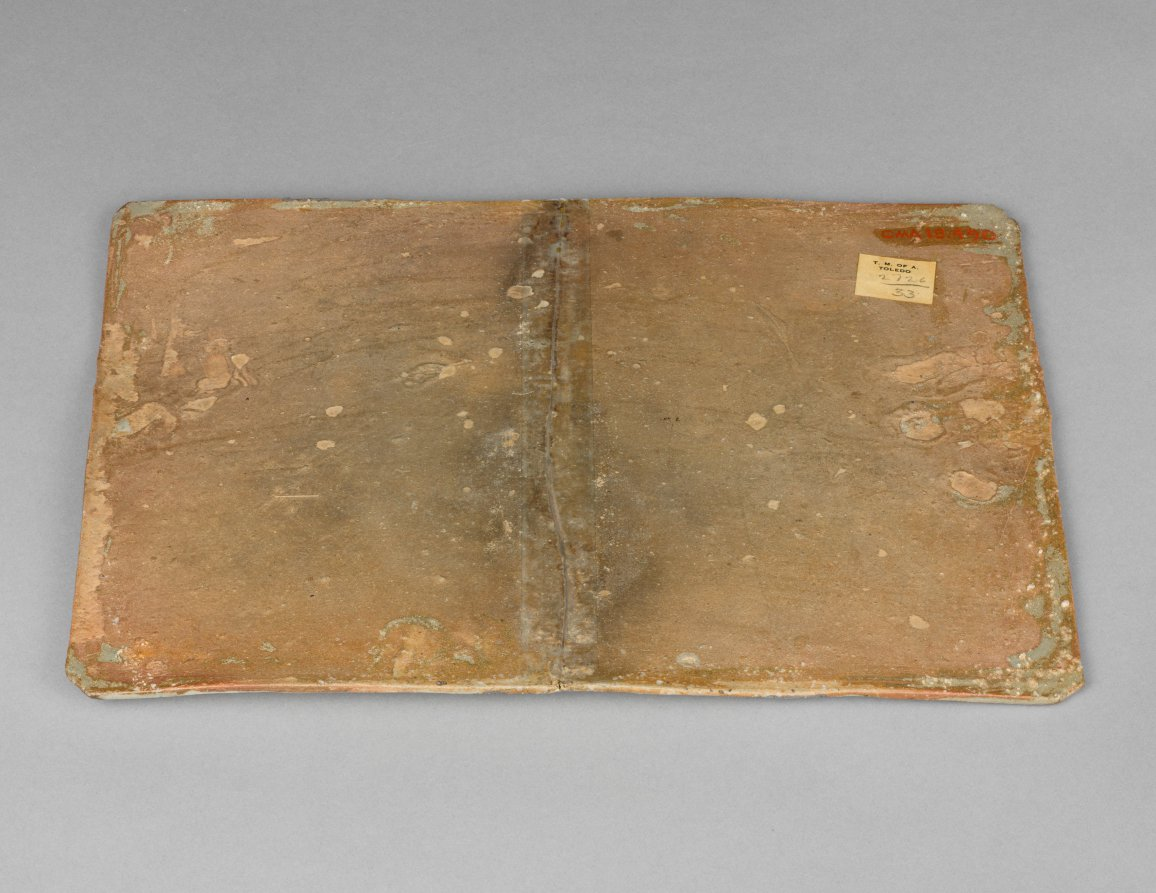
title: Plaque with Inlaid Peony and Chrysanthemum Design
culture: Korea, Goryeo dynasty (918–1392)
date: 1200s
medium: celadon with inlaid decoration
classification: Ceramic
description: Celadons, spoons, seals, and bronze mirrors were the most common burial objects in tombs during the Goryeo period (918-1392). Furnishing tombs with an elaborate assemblage of objects was believed to honor and comfort the newly dead. This type of celadon tile, elegantly adorned with the image of flowers such as bloomed peonies and chrysanthemums, was used to embellish the interior of buildings.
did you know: Celadon tiles such as this one were mainly produced in state kilns located in Kangjin and Buan, Jeolla province.